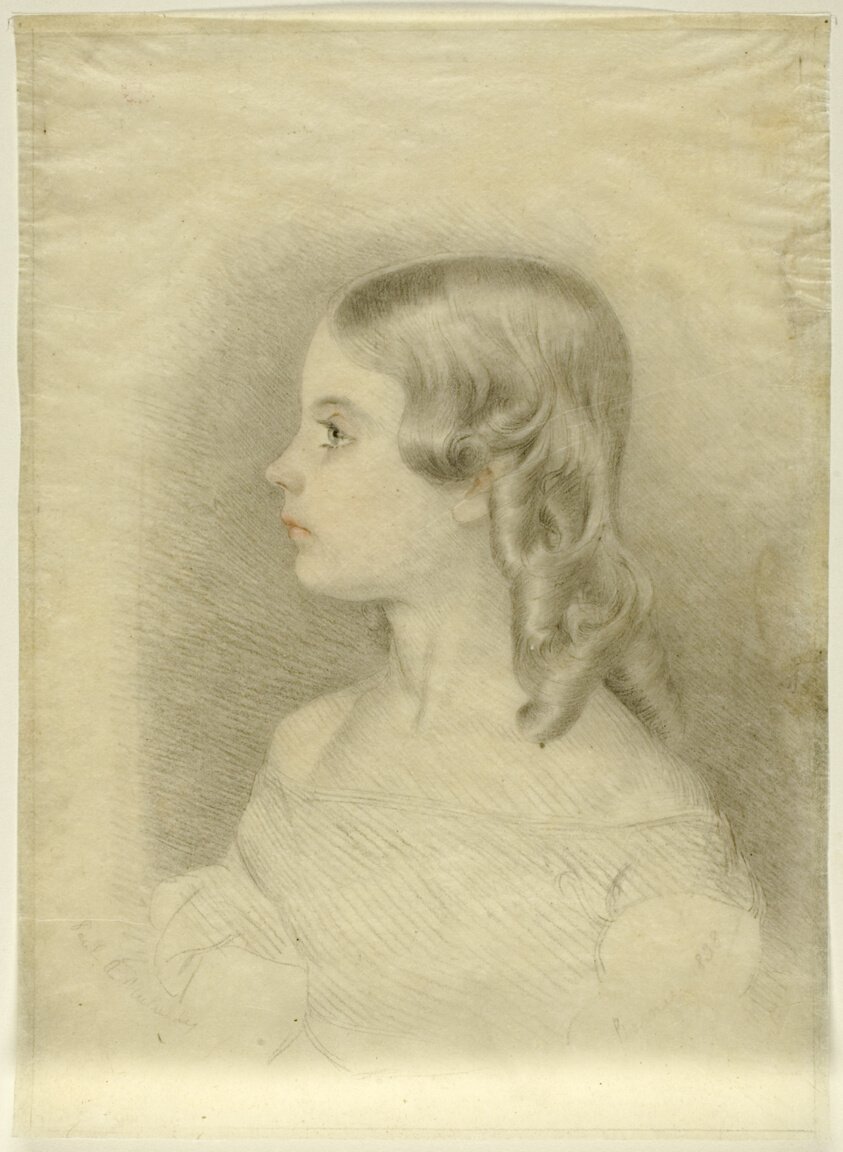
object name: Drawing and Watercolor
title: Profile Portrait of a Girl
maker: Paul A. Mulready (English, 1827-1855)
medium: Graphite and black chalk, heightened with watercolor and watercolor wash, on light weight cream wove paper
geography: England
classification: chalk; drawings (visual works); prints and drawing